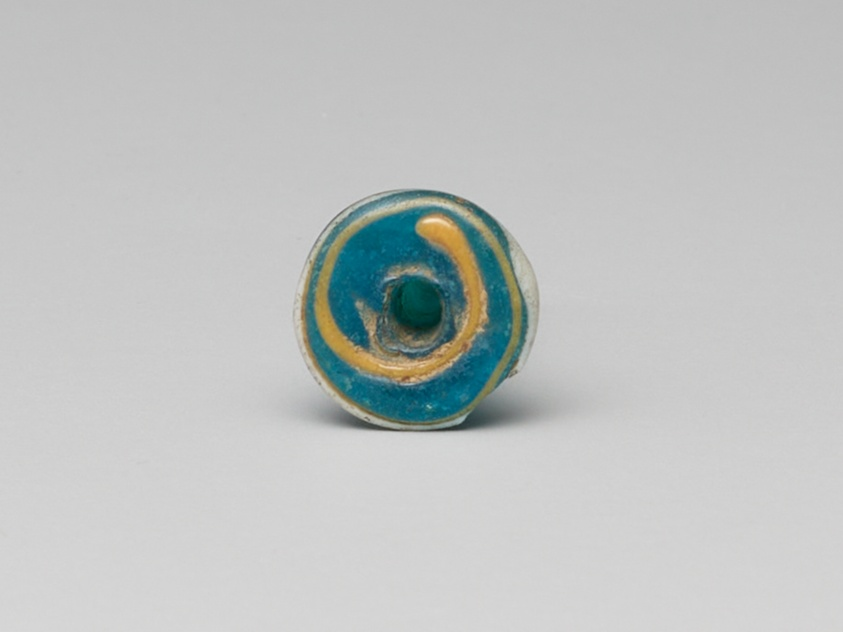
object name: Costume and Accessories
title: Ear Stud or Bead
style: eighteenth dynasty, new kingdom, ancient, egyptian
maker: Egyptian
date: New Kingdom, mid–Dynasty 18–19, about 1390–1186 BCE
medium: Glass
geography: Egypt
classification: glass; jewelry; amulet; ancient art; costume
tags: decoration